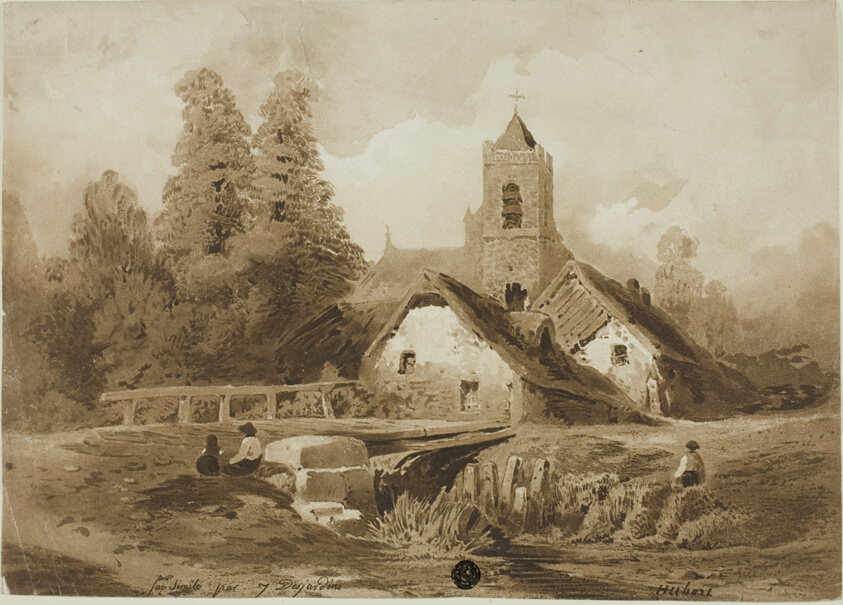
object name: Drawing and Watercolor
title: Village Corners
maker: Jacques Desjardins (Dutch, 1671-1716); after Hubert (unknown, likely 17th century)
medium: Photogravure on modern laid paper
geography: Holland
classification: reproduction; print; prints and drawing; drawings (visual works)